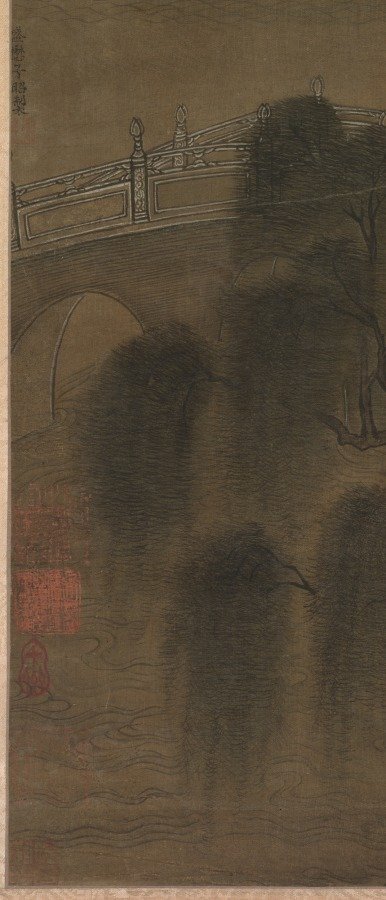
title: Court Ladies in the Imperial Palace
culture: China, Yuan dynasty (1271-1368)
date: 1271–1368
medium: hanging scroll, color on silk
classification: Painting